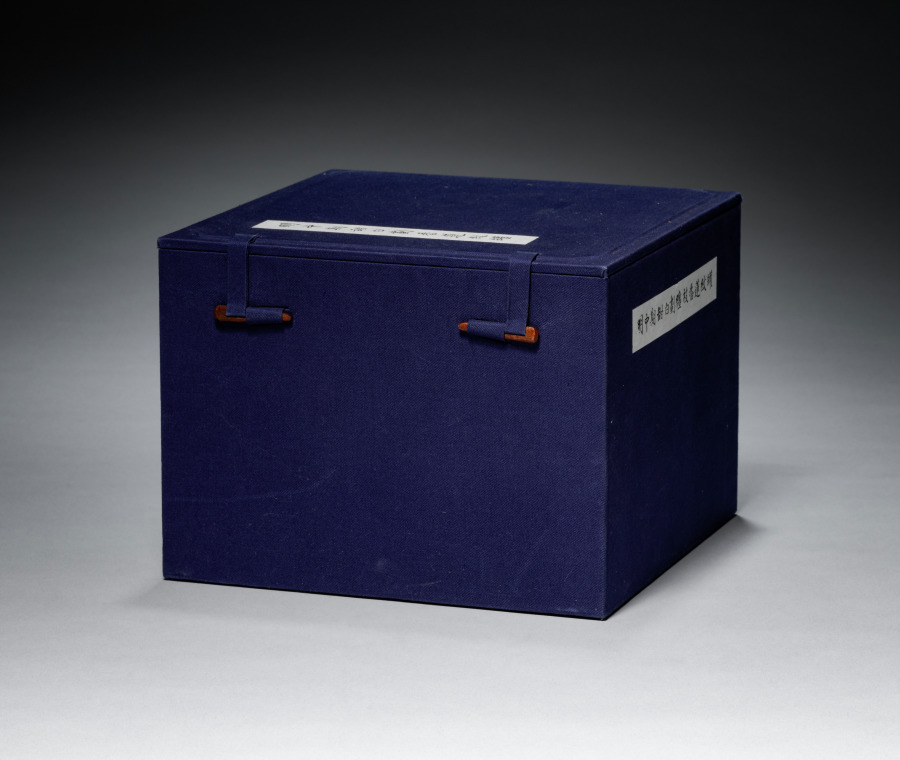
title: White-Glazed Jar with Hidden Design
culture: China, Jiangxi province, Jingdezhen kilns, Ming dynasty (1368-1644)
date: 1500s–1600s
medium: Porcelain with sweet-white (tianbai; 甜白) glaze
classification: Ceramic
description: White was a ritual color used in Buddhist ceremonies, as well as the color of mourning. This jar is made of two molded halves that were joined where the vessel’s middle section shows a raised line. It is covered by a silky white glaze called “sweet-white” (tianbai; 甜白). A “hidden design” (anhua; 暗花) of floral scrolls on the shoulder and stylized petals around the base shine through the glaze. The jar may have been used as a planter, a vase for flowers, or it may have held incense sticks on a home altar.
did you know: Tianbai, or sweet-white glaze, was developed to accommodate the Yongle emperor’s (reigned 1403–24) preference for white ceramics.